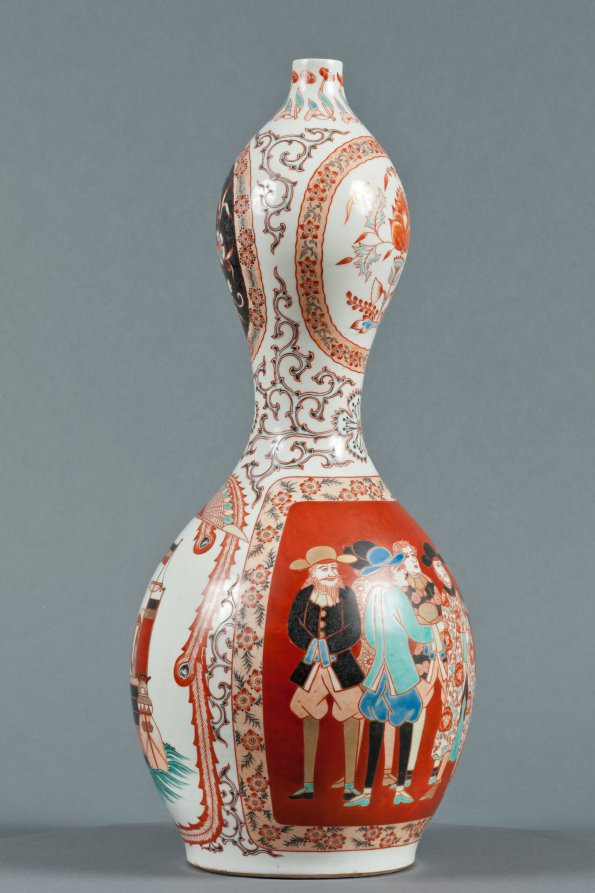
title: Bottle with Western Ships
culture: Japan, Edo period (1615–1868)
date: c. 1800–1868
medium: Porcelain with decoration in colored enamels and underglaze blue, overglaze enamels, and gold (Hizen ware, Arita type)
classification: Ceramic